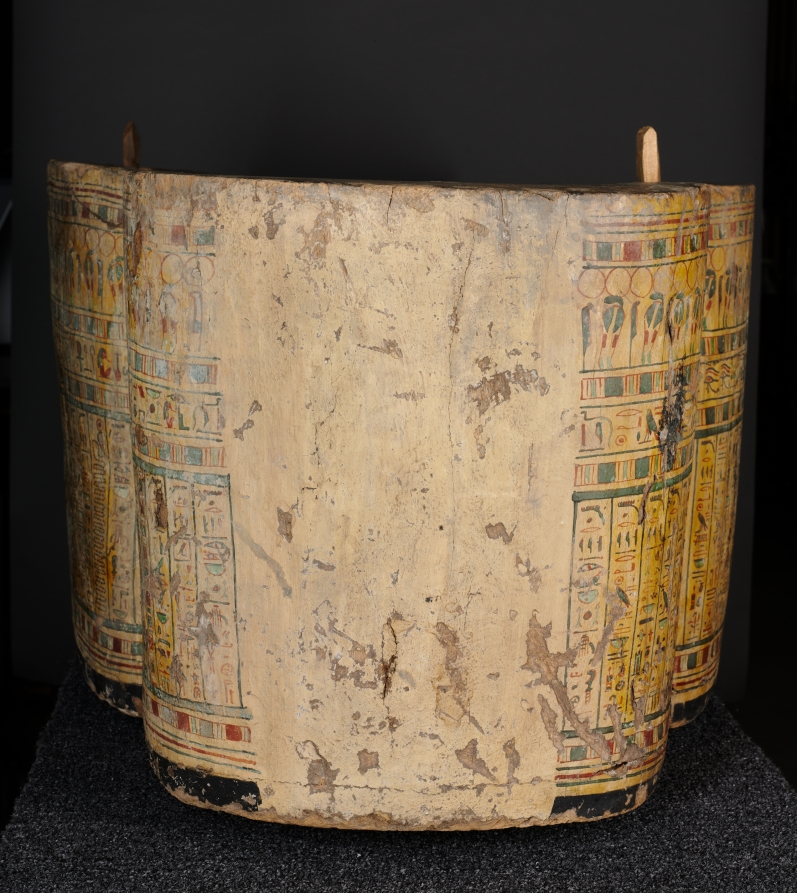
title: Coffin of Nesykhonsu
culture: Egypt, Thebes, Third Intermediate (1069–715 BCE), Dynasties 21–22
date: c. 976–889 BCE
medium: gessoed and painted sycamore fig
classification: Funerary Equipment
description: Egyptian coffins told stories and illustrated spells to help the deceased transition safely to the afterlife. Inside Nesykhonsu's coffin there are two jackals, one facing right and the other left, near the top. Here, the jackal represents the powerful deity Anubis, the god of the afterlife and embalming.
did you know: Two of Nesykhonsu's titles, "Lady of the House" and "Singer of the Choir of Mut the Great," are written on the outside of the coffin.